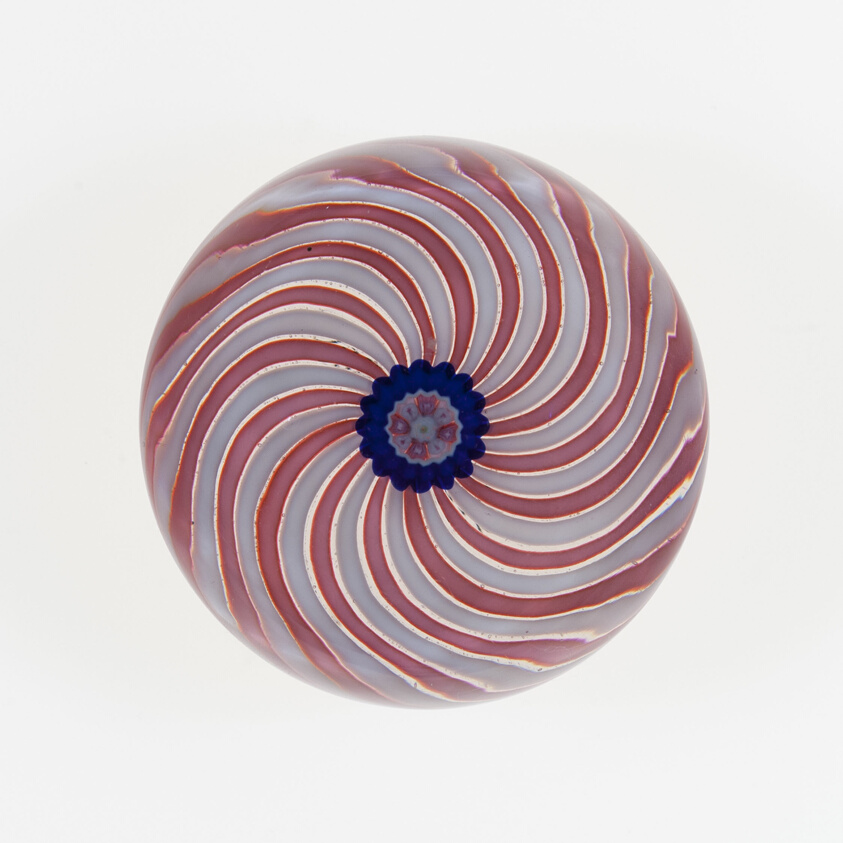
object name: Glass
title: Paperweight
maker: Clichy Glassworks (Cristalleries de Clichy); Clichy, France, 1837-1885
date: c. 1845–60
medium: Glass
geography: Clichy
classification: paperweight; glass